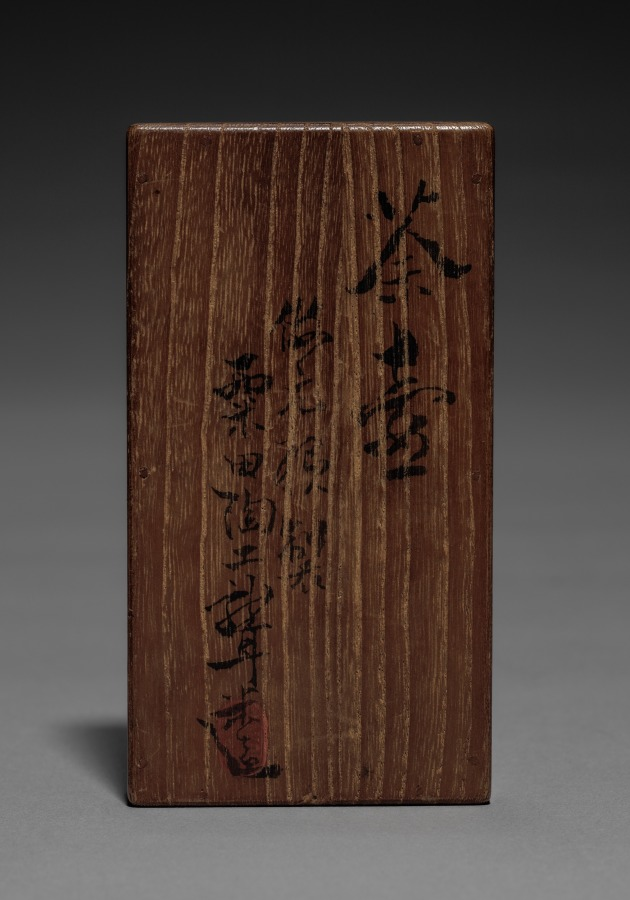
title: Pair of Tea Containers with Plum Blossoms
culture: Japan, Edo period (1615–1868)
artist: Aoki Mokubei (Japanese, 1767–1833)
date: early 1800s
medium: porcelain with underglaze blue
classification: Ceramic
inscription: signed "Ro Mokubei" on base in underglaze blue.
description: Aoki Mokubei, born into a family of restaurateurs, was a potter, calligrapher, painter, and scholar, and is considered one of the three masters of later Edo period Kyoto ceramics. He specialized in porcelains fashioned after Chinese prototypes, and created works for steeped tea (sencha) such as these matching tea caddies decorated in an underglaze blue called sometsuke—literally “with applied dye.” He signed them on their bottoms. They also have intricately patterned silk sleeves to both beautify and protect them. On the exterior of the lid of the outer wooden box that contains them, it is written that Mokubei inscribed and painted an image on the box. On the interior of the lid, the signature and seals of a former owner are written. Mokubei has signed the lid of the inner box, and a charming ink and light color composition of West Lake in Hangzhou in China covers its three sides. On the fourth side is a long inscription by Mokubei describing the scene.